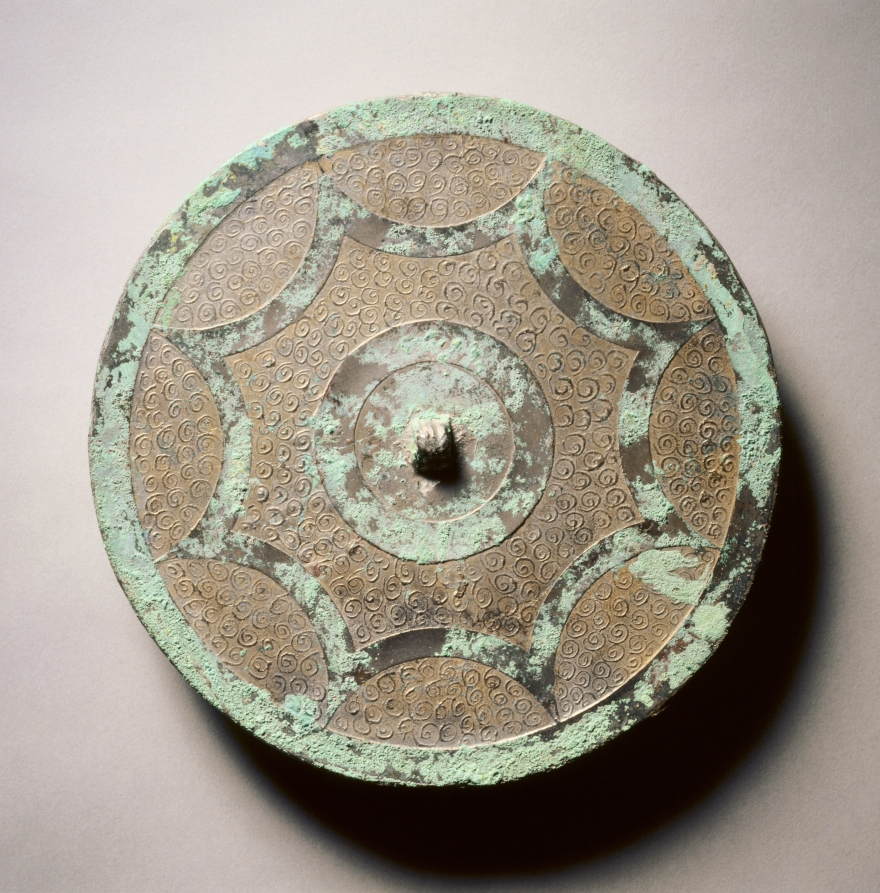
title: Mirror with Continuous Arcs against Whorl Pattern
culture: China, Eastern Zhou dynasty (770–256 BCE), Warring States period (475–221 BCE)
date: 200s BCE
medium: bronze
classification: Metalwork